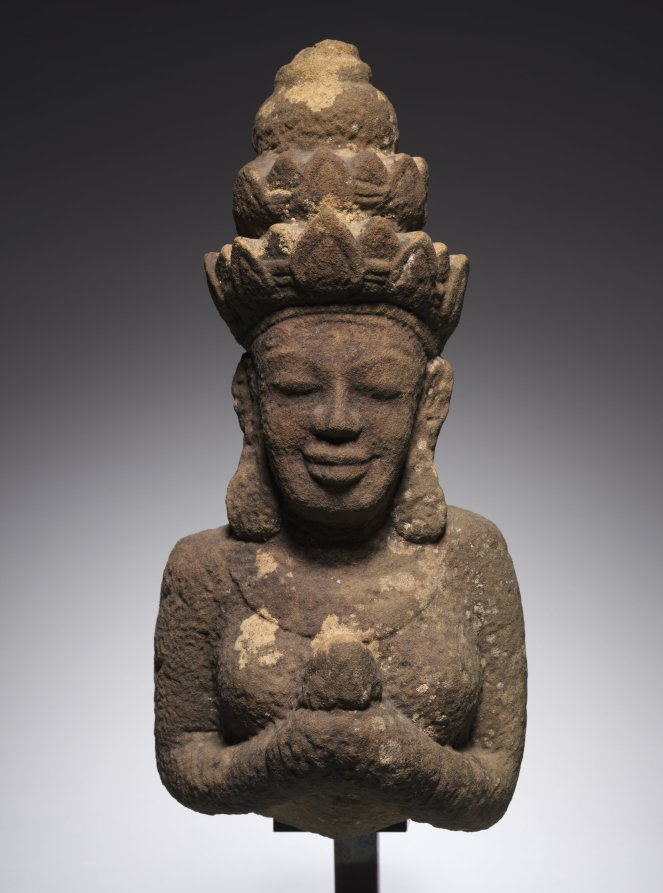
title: Apsara Bracket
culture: Vietnam (Champa)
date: 900s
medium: Sandstone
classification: Sculpture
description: This celestial being is a resident of heaven, ornamented as a goddess with tiered crown, heavy earrings, and broad necklace. She reverently proffers an offering, possibly a lotus bud. This figure would have been part of the embellishment of a Cham temple. Her bust emerges from an architectural element that may have formed the end of a balustrade or ceiling bracket.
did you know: The light-colored spots are due to lichen and other organic growths that have hardened over time, the result of outdoor weathering.